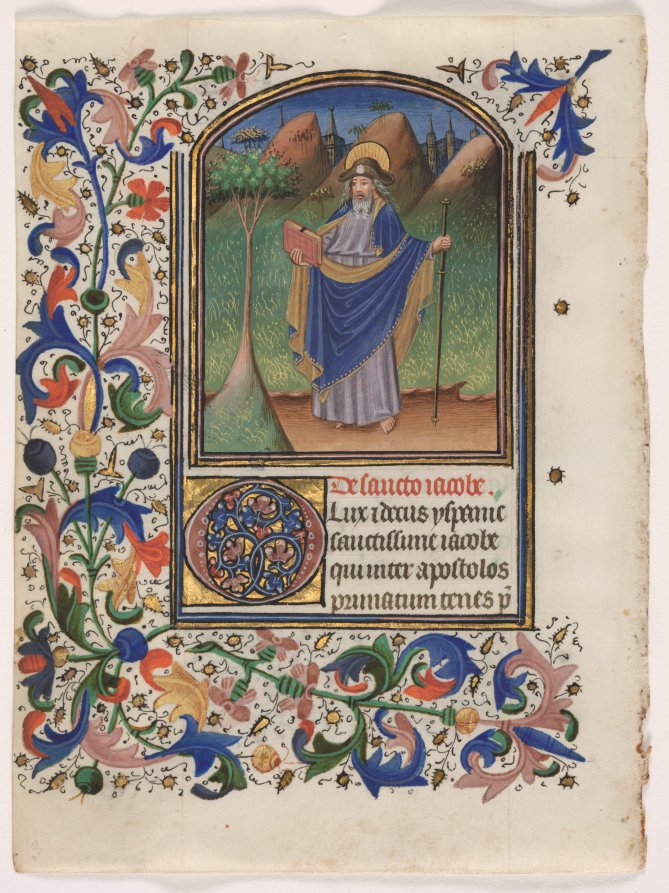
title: Leaf from a Book of Hours: Saint James the Greater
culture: Flanders, Bruges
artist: Master of the Gold Scrolls (Belgian)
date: c. 1440–1450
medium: ink, tempera and gold on vellum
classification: Manuscript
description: The illuminator of this leaf is one of a group of painters and workshops collectively known as the "Masters of the Gold Scrolls," named after the gold tendrils that frequently, but not always, occupy the backgrounds of the group’s compositions. The present miniature is by one of the Gold Scrolls’ finest hands. From the 1440s onward, the gold scroll motif begins to disappear in their miniatures and replaced, as here, by landscape. Saint James the Greater is shown as a Christian pilgrim. The miniature would have appeared in the Suffrages of the book of hours.